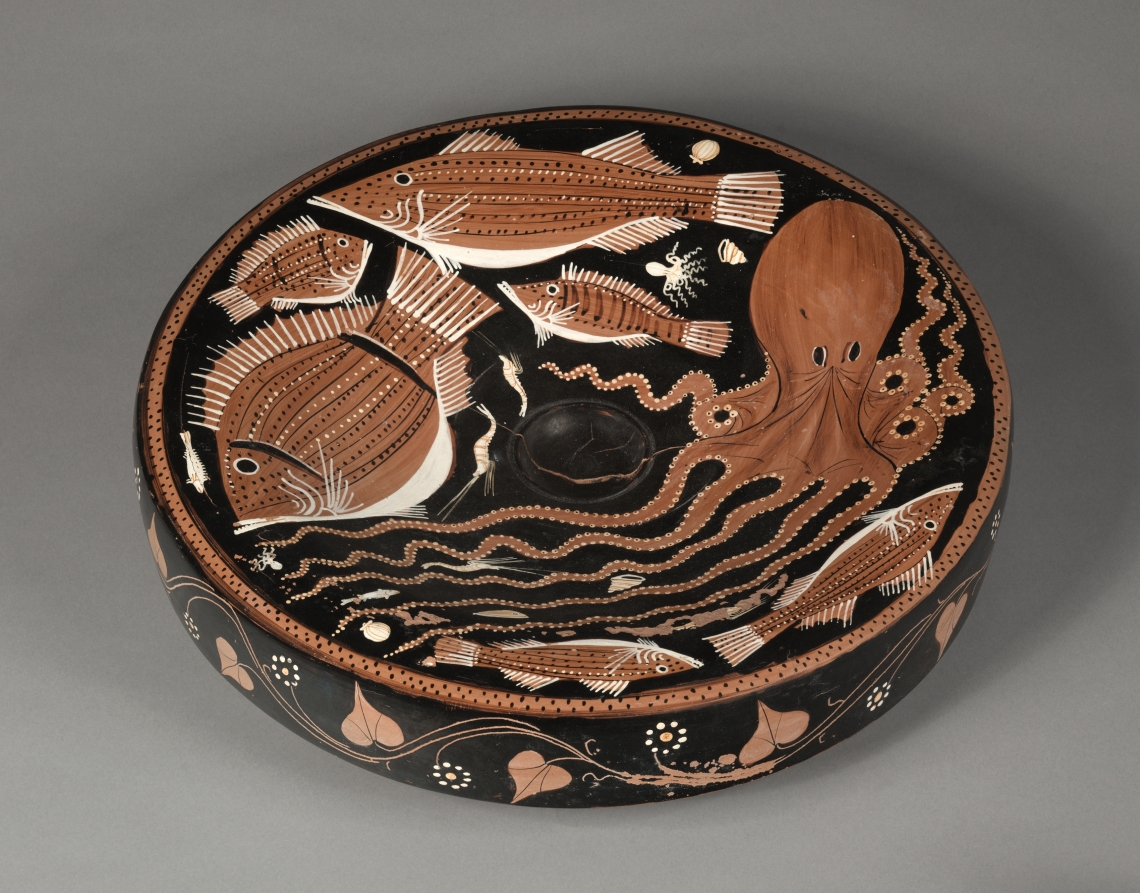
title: Red-Figure Fish Plate: Octopi, Mullet, Bream, Shellfish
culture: South Italian, Paestan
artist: attributed to Asteas/Python Workshop (South Italian, Paestan, active c. 360–320 BCE)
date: c. 340–330 BCE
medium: ceramic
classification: Ceramic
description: Although first developed in Athens, red-figure fish plates became especially popular in South Italy and Sicily in the 300s BC. All feature a short foot and a small central depression, but those produced in the workshop of Asteas and Python, like this one, are the largest and most ornate. Archaeologists have closely studied the fish and other sea creatures represented, identifying many of them with species still found (and eaten) in the Mediterranean; included here are octopi, mullet, bream, and various shellfish.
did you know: Perfect for serving seafood, this plate features images of sea creatures and a central well for dipping or collecting juices.